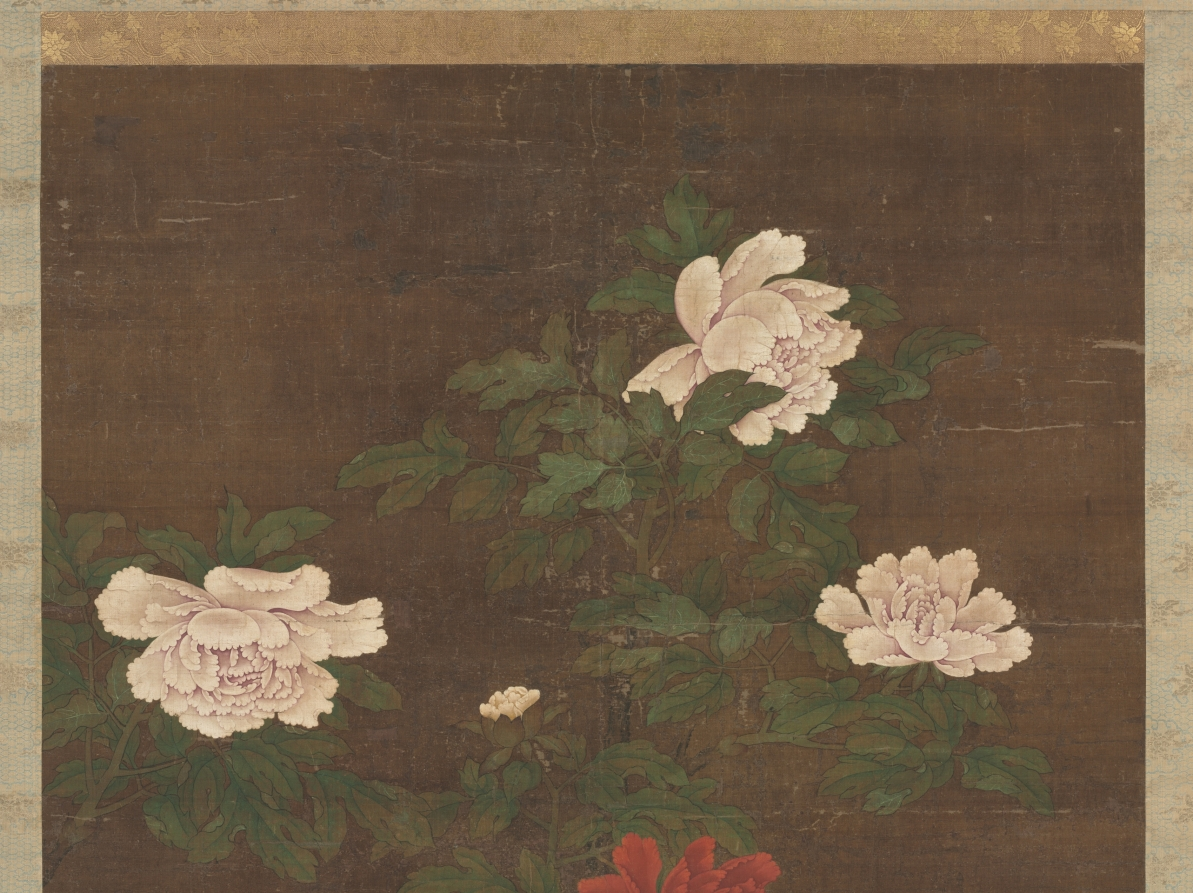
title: Peonies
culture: China, Yuan dynasty (1271-1368)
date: late 1200s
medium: hanging scroll, ink and color on silk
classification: Painting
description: In China, the peony is considered the Queen of Flowers, representing the late spring season. The shrubs of this tree peony are in full bloom, blossoming in various colors. Peony paintings were popular from the Southern Song period to the Ming dynasty. The large scale of this decorative scroll suggests that it may have been hung in a reception hall, conveying good wishes for wealth and prosperity.